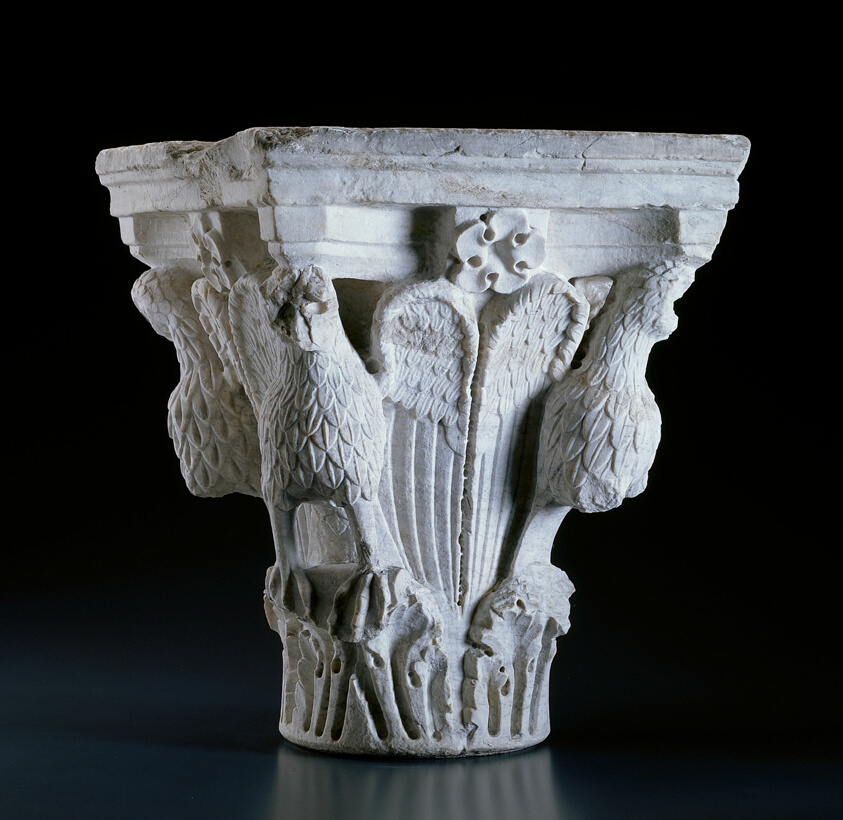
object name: Sculpture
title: Capital with Eagles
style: medieval, 13th century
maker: Southern Italian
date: 1230/40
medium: Marble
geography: Italy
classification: architectural sculpture; sculpture; architectural detail; architectural fragment; Italian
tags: eagles, architectural detail, architectural fragments, architectural fragment, architechture, birds